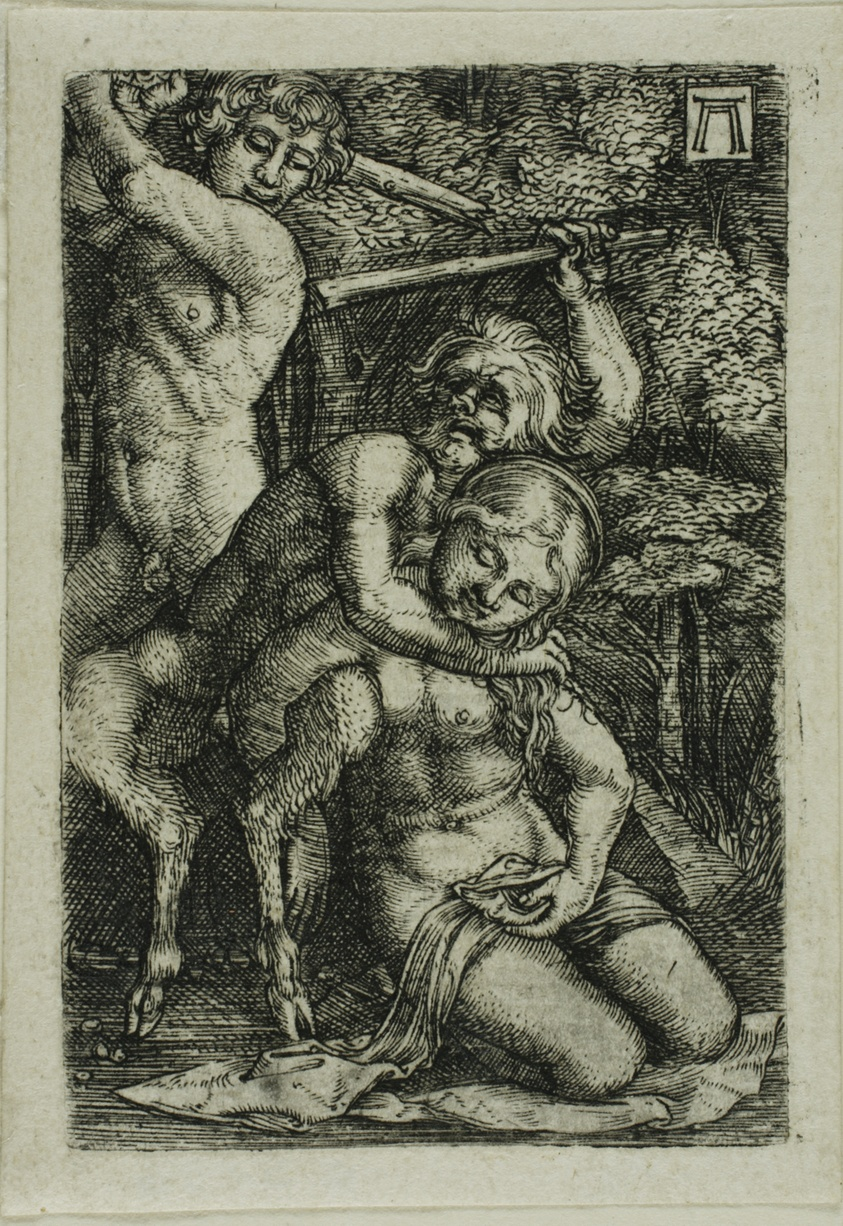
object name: Print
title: Two Satyrs Fighting Over a Nymph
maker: Albrecht Altdorfer (German, c.1480-1538); after Marcantonio Raimondi (Italian, c.1480-1534)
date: 1520/1525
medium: Engraving in black on ivory laid paper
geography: Germany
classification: engraving; print; prints and drawing